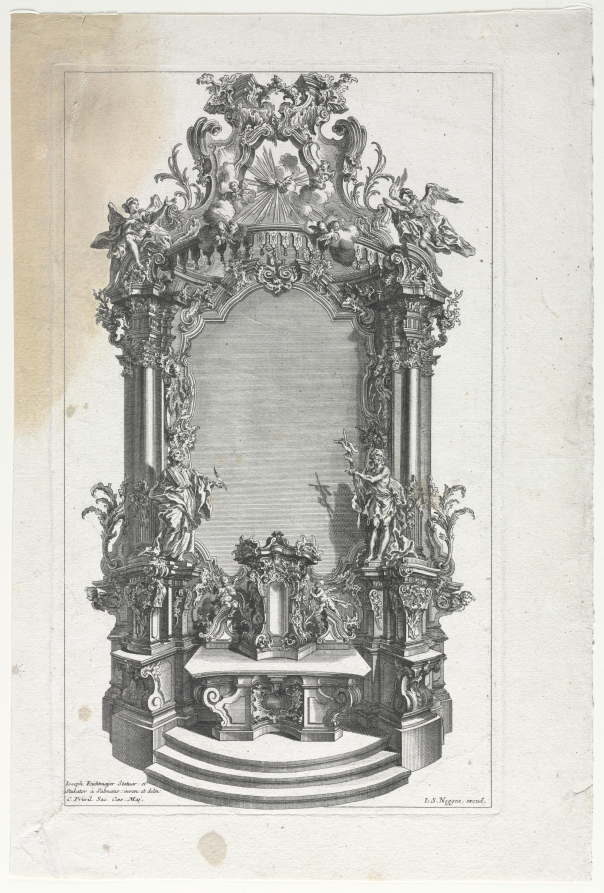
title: Model for Altar for Woodcarvers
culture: Germany, 18th century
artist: Gottfried Bernhard Götz (German, 1708–1774)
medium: engraving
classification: Print